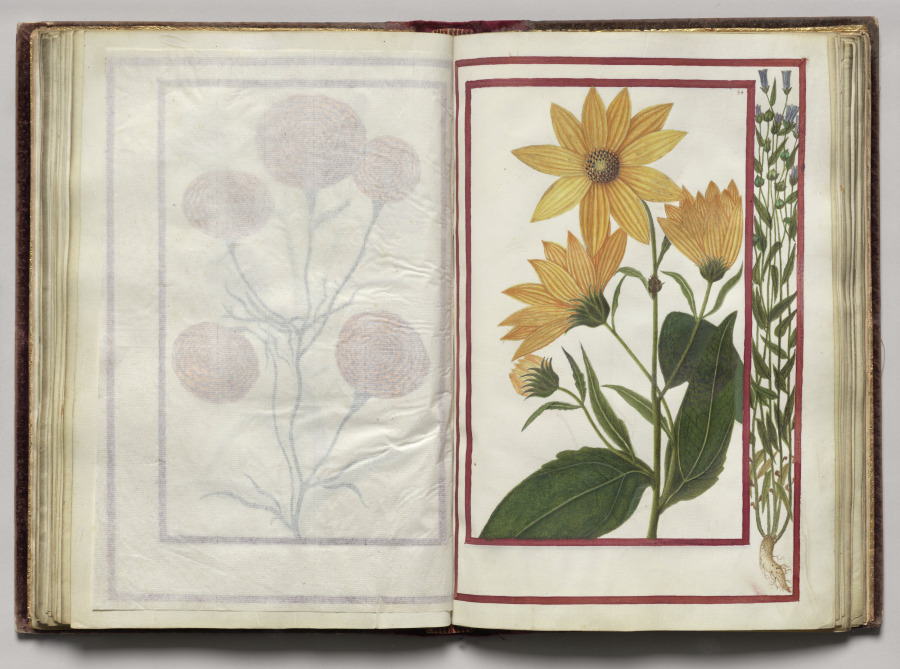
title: Helianthus with Blue Flower Border, folio 28 (recto), from Florilegium (A Book of Flower Studies)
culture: France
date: 1608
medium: watercolor, ink, silver, and gold over occasional traces of pencil, on vellum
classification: Bound Volume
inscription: Dated: Poitiers 1608 (on frontispiece) Signed: On frontispiece in black ink, lower right: Van Kuyk Notation on drawing: Frontispiece: in pencil, lower margin: * élève de Van Kessel, peintre flammand (* in pencil also appears in front of Van Kuyk's name).